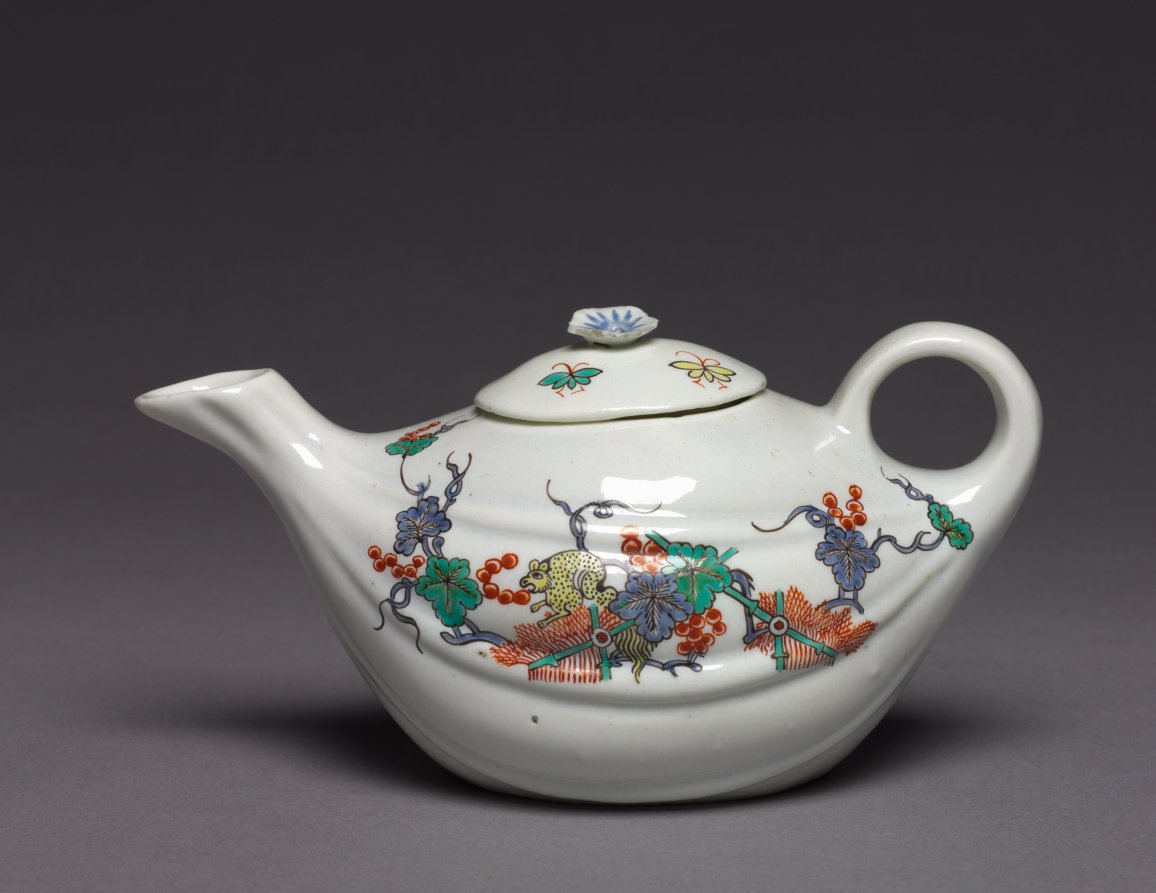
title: Teapot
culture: France, Chantilly, 18th century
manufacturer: Chantilly Porcelain Factory (French)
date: c. 1730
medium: soft-paste porcelain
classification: Ceramic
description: The pieces composing this individual tea set are entirely typical of Chantilly soft-paste porcelain in the Kakiemon style. Both the form and decoration of these pieces were inspired by Japanese prototypes. The use of knobs in the form of trumpet-shaped blossoms is characteristic of Chantilly wares.